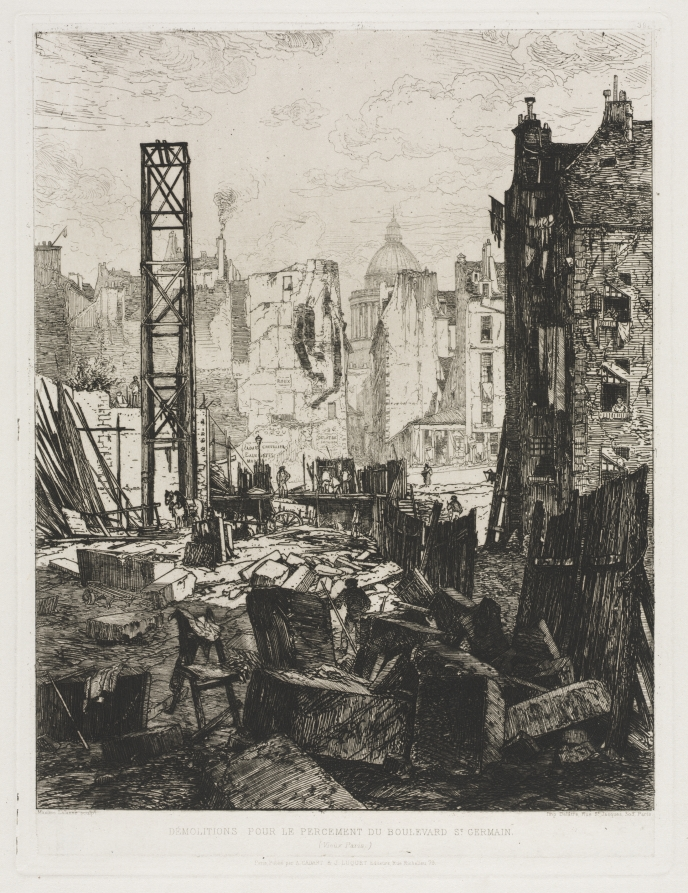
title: Demolition for the Opening of Boulevard St. Germain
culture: France, 19th century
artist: Maxime Lalanne (French, 1827–1886)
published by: A. Cadart & J. Luquet, rue Richelieu, 79, Paris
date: 1862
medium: etching on chine collé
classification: Print